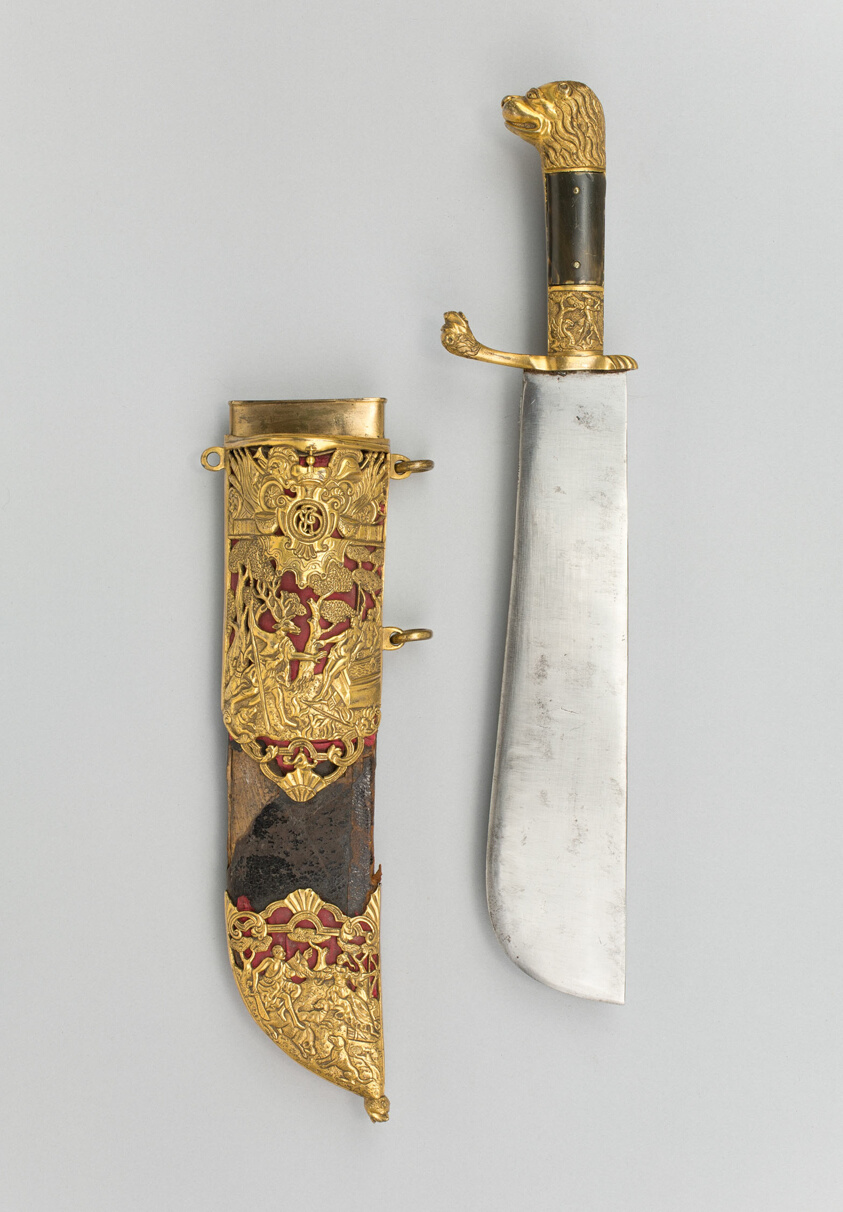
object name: Arms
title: Hunting Cleaver (Waidpraxe) of Ernst August II Konstantin, Duke of Saxe-Weimar-Eisenach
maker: German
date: 1755/58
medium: Steel, bronze, gilding, horn, wood, leather, and silk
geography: Germany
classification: cutlery; arms and armor, miscellaneous; arms and armor; arms